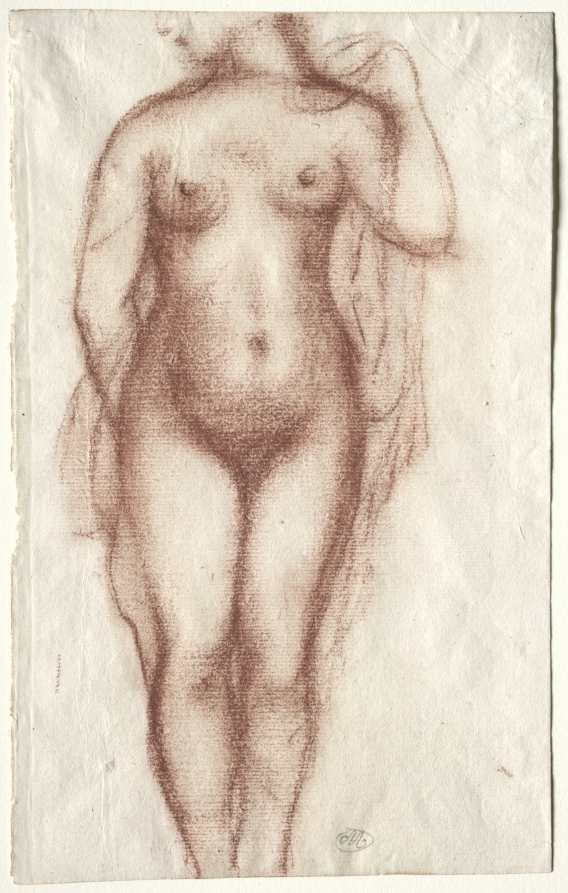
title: Nude Woman Standing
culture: France, 20th century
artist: Aristide Maillol (French, 1861–1944)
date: c. 1885–1926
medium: sanguine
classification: Drawing